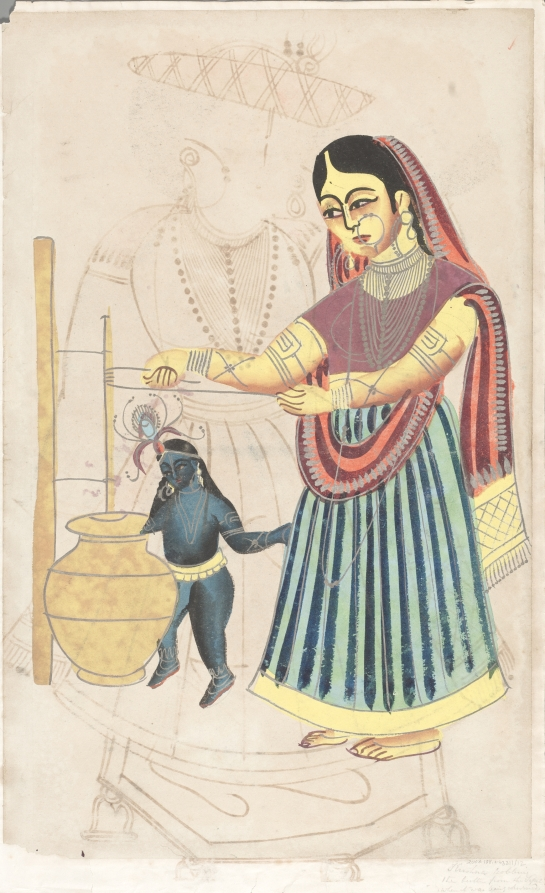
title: Yasoda Churning Butter (verso), from a Kalighat album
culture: Eastern India, Bengal, Kolkata, Kalighat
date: c. 1890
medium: Gum tempera, graphite, ink, and tin on paper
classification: Painting